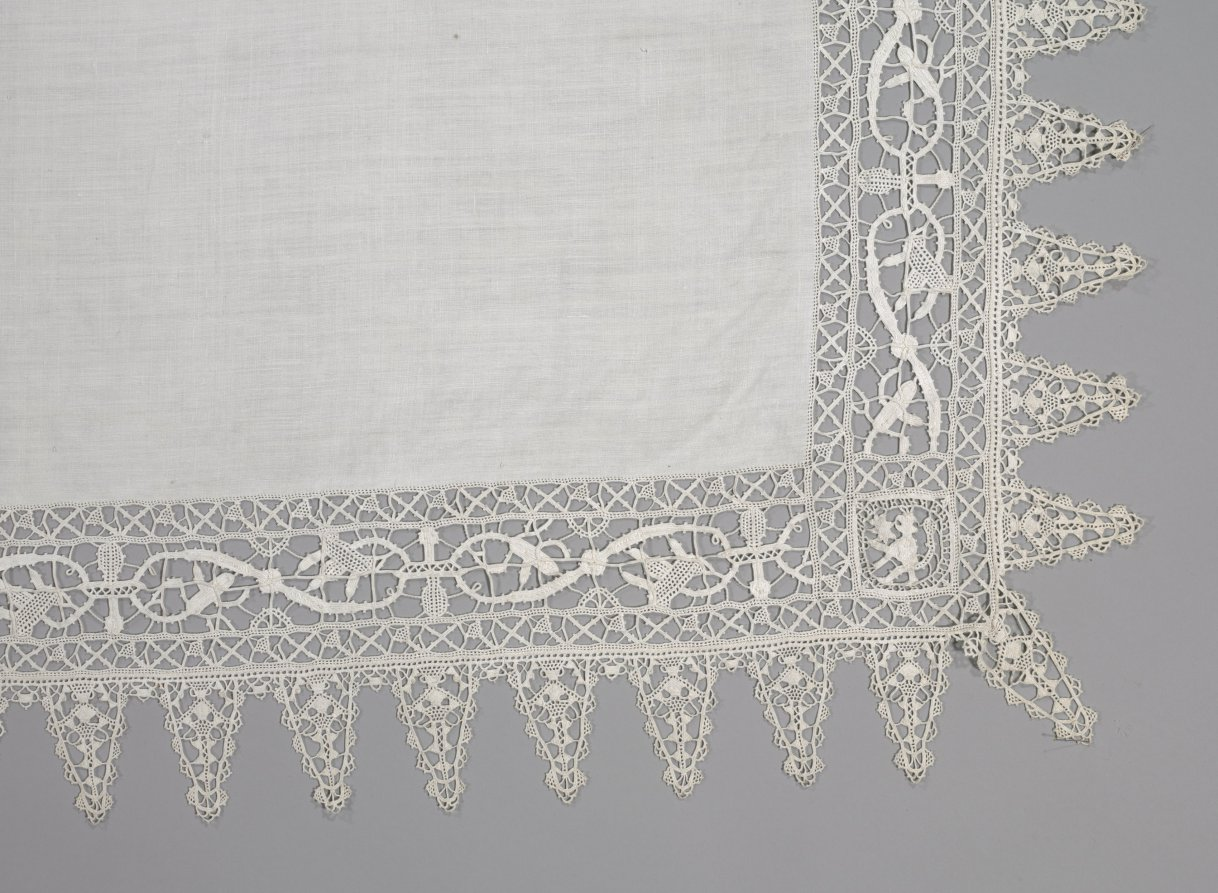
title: Lace Cloth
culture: Italy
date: 1560–99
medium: Linen: needle lace (reticella) insertion and bobbin lace insertion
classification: Lace